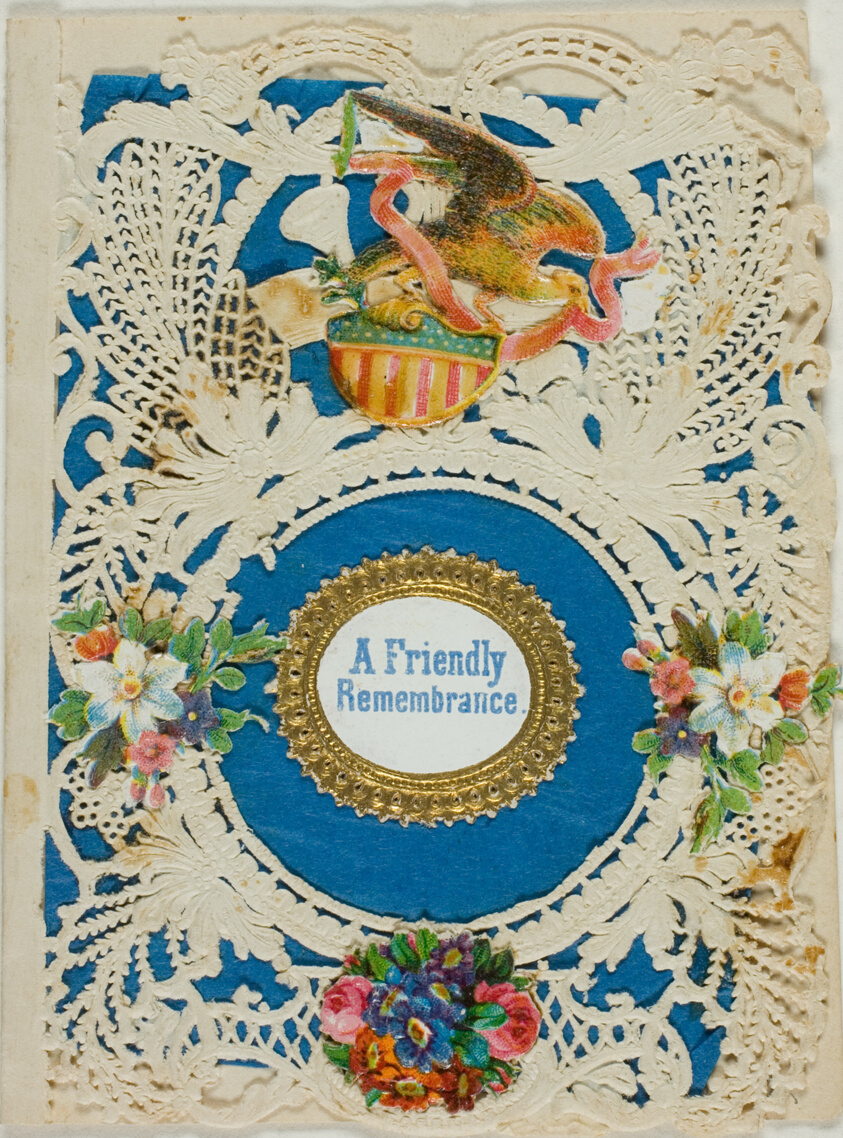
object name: Drawing and Watercolor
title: A Friendly Remembrance (valentine)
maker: Unknown Artist; American or English, 19th century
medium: Collaged elements on cut and embossed ivory wove paper (folded), with blue wove paper insert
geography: United States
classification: valentine; prints and drawing; paper